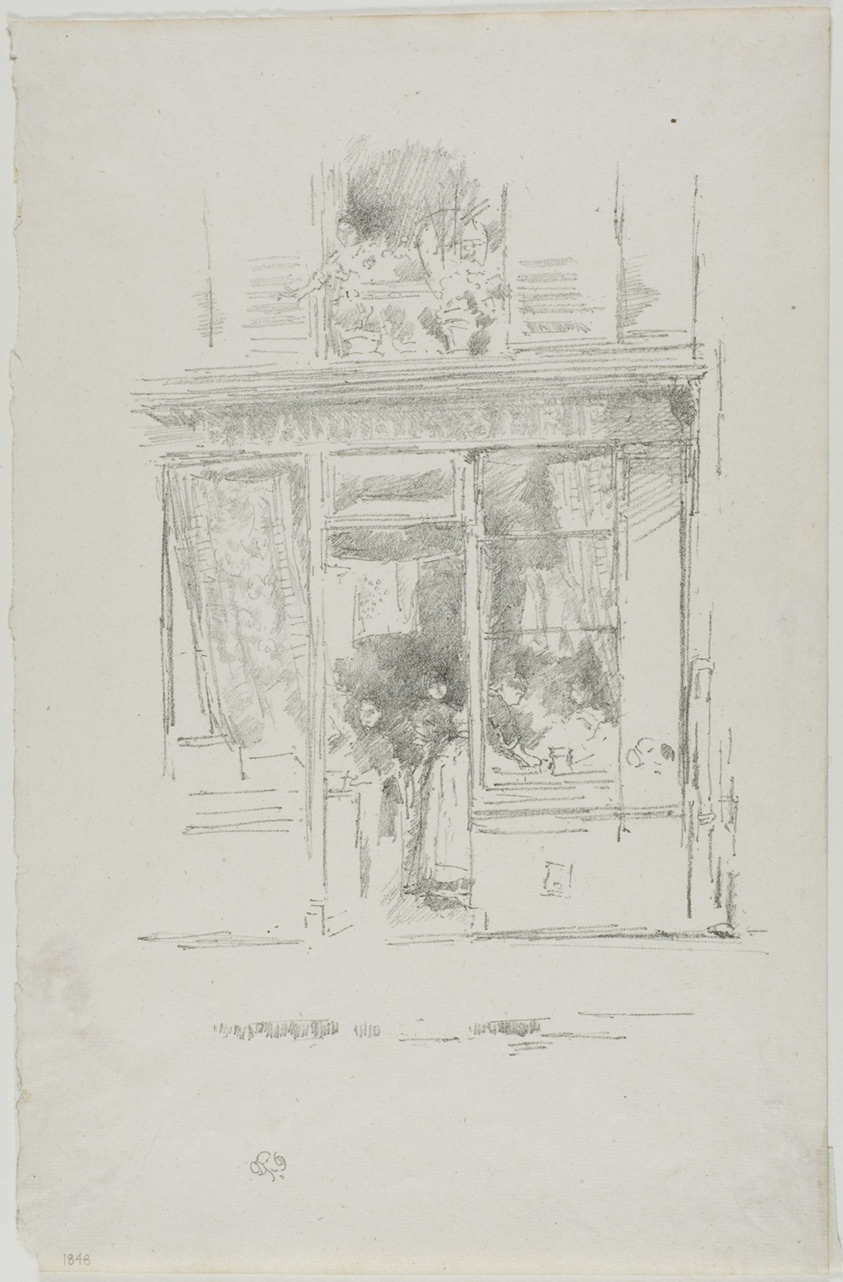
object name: Print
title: The Laundress: "La Blanchisseuse de la place Dauphine"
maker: James McNeill Whistler (American, 1834-1903)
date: 1894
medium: Transfer lithograph in black on ivory laid paper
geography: United States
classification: transfer lithograph; lithograph; print; prints and drawing; paper